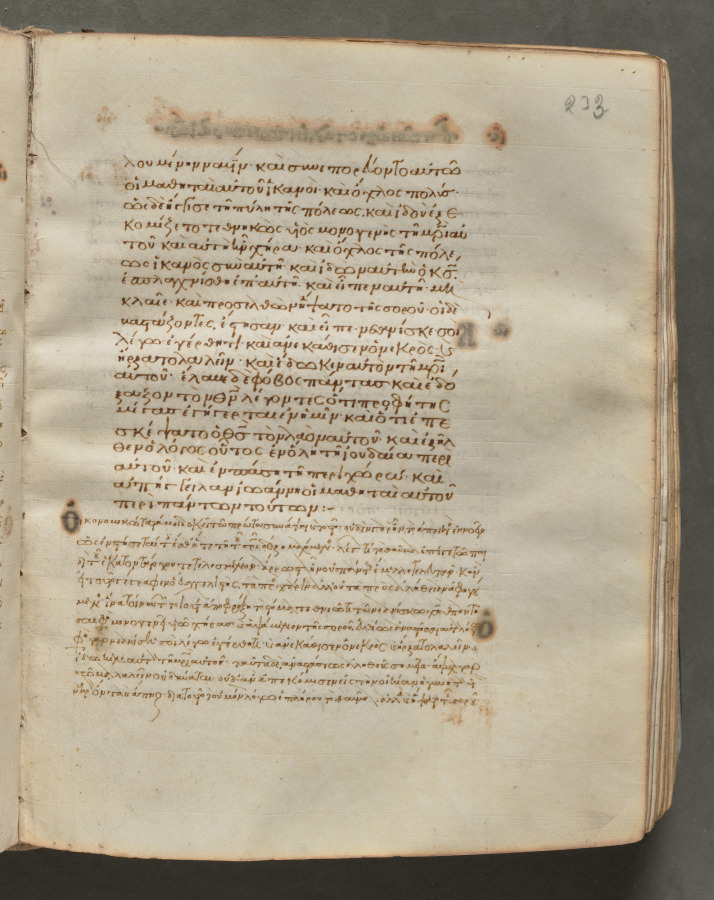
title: Text, folio 233 (recto), from a Gospel Book with Commentaries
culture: Byzantium, Constantinople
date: c. 1000–1100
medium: ink, tempera, and gold on vellum; leather binding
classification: Bound Volume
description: Each of the four gospels in this book opens on a page with brilliantly illuminated borders depicting the author of the text as well as birds—principally peacocks, symbols of the immortality of the soul—and fountains, representing the fountain of life and the salvation of the soul. This volume consists of 428 leaves with texts in Greek. Its level of sophistication suggests that it was probably written and decorated in a monastery in Constantinople.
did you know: Gospel books were carried in procession through Byzantine churches.